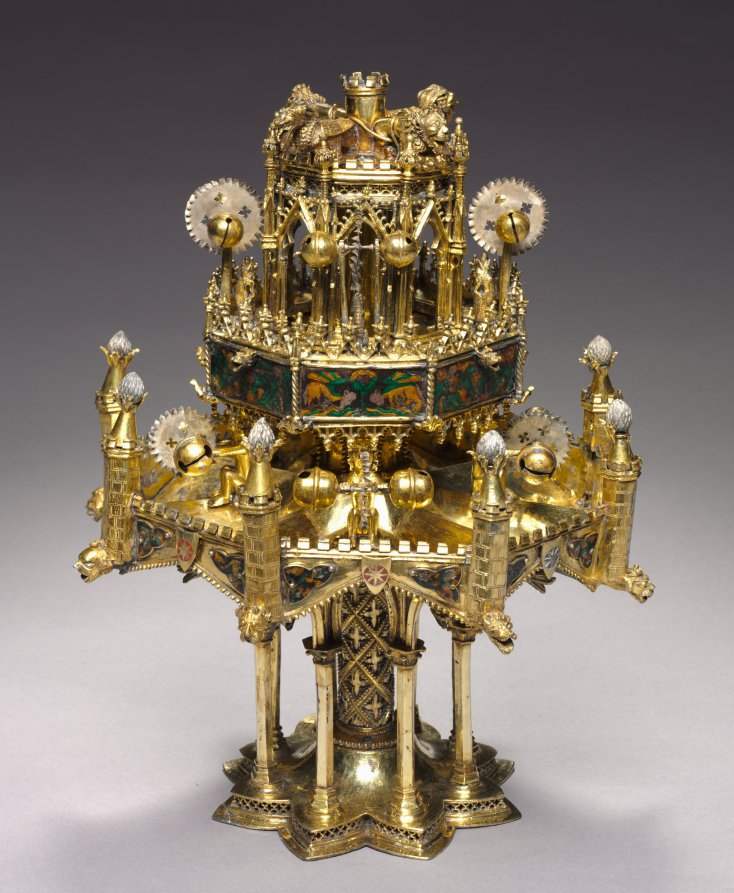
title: Table Fountain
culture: France, Paris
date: c. 1320–40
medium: gilt-silver and translucent enamels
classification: Metalwork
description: Conceptually and stylistically, this object is beyond all else a piece of Gothic architecture in miniature with vaults, pinnacles, columns, and traceried arches. Though the artist who created it is unknown, he was unquestionably inspired by the great Gothic buildings of his time. The table fountain is a three-tiered assembly combining cast elements with bent sheets of gilt-silver. To these have been attached a series of enamel plaques representing grotesque figures, some of which play musical instruments. Water wheels and bells were added to capture motion and sound. The rich detail, precious materials, and involved ornamentation of this deluxe object suggest it would have been expensive to produce and highly treasured by its original owner, someone of high status, and would have been deployed as an object of spectacle. This is the most complete example of its type known to survive from the Middle Ages. Medieval inventories reveal that small fountains like this, often taking various forms, and generally made from precious metals, once existed in large numbers, thus making the Cleveland table fountain an extremely rare object.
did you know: This fountain with its minute architectural details and finely made enamel plaques displayed the wealth and refinement of the owner as it entertained his guests. Imagine hearing the ringing of the tiny bells when this fountain was in use.